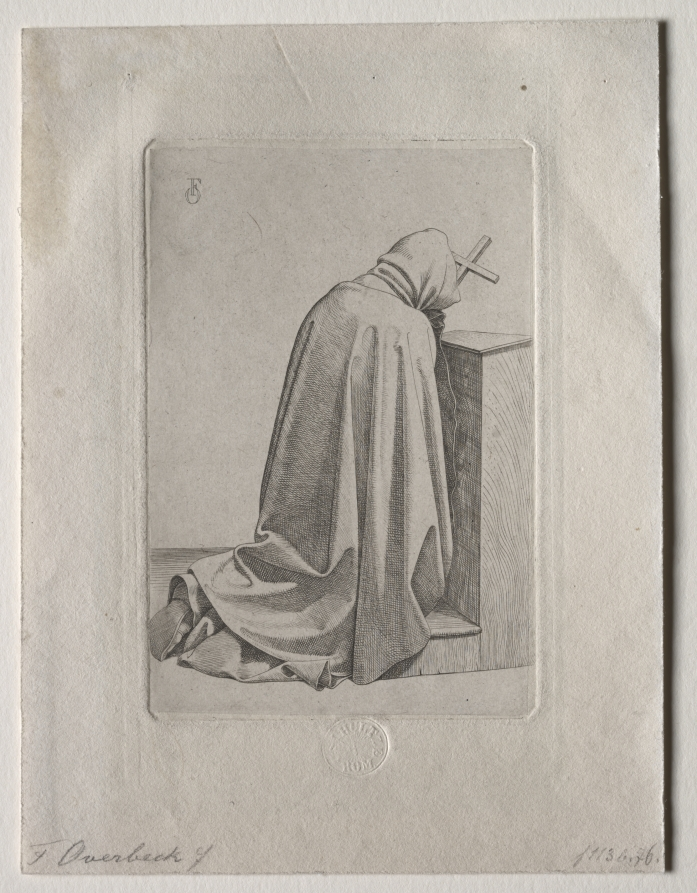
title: A Praying Monk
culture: Germany, 19th century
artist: Johann Friedrich Overbeck (German, 1789–1869)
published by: Carl Schulze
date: 1826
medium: etching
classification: Print